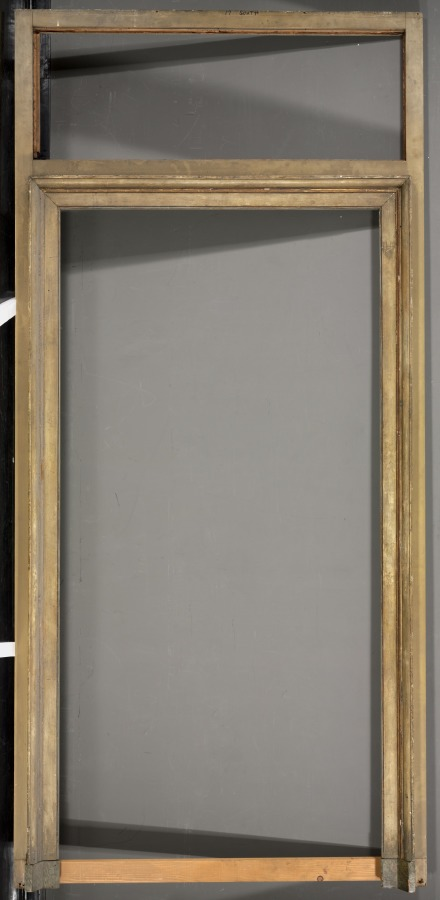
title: Double-leaf Doors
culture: France, 18th century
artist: Pierre Rousseau (French, 1751–1829)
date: 1790s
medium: oil on wood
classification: Painting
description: Shifts in style and taste often result in changes to original architectural details. Rousseau painted these doors with imitation dark wood grain. Another craftsman later scraped off the dark color surrounding the classical designs. This set was conserved in 1979 and retains more traces of the original graining than the other doors by this artist in the museum's collection.